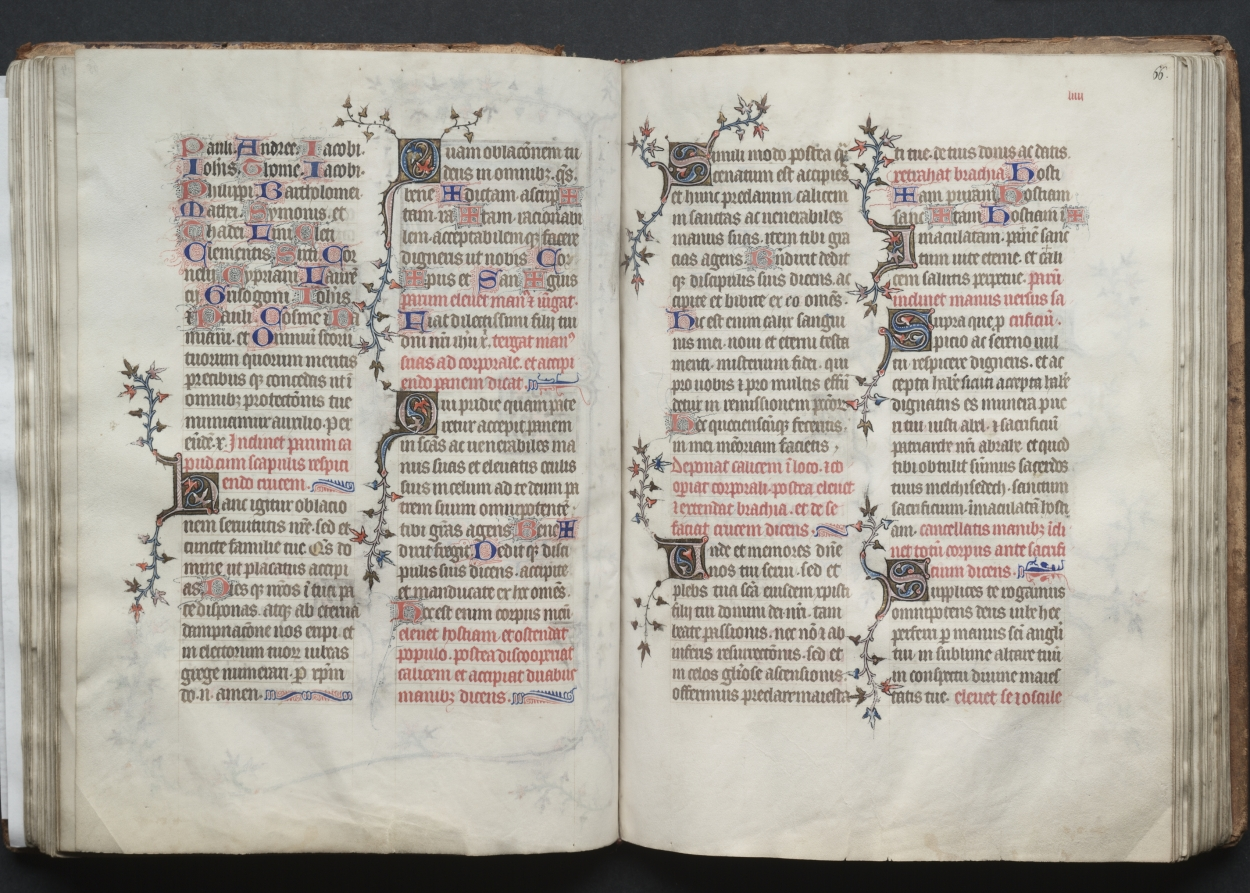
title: The Gotha Missal: Fol. 66r, Text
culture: France, Paris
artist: Master of the Boqueteaux (French)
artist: and Workshop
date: c. 1375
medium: ink, tempera, and gold on vellum; blind-tooled leather binding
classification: Bound Volume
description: The style and quality of this manuscript's decoration is typical of deluxe Parisian books made for aristocratic or royal patrons. Most of the book's decoration appears to be the work of the Master of the Boqueteaux, an artist active at the court of King Charles V (died 1380). His style was apparently shared by a number of book illuminators working in and around Paris. It is very possible that the Gotha Missal belonged to Charles V, but is not provable because the manuscript has no royal portraits and lacks a colophon. Given the book's magnificent decoration, however, it would seem that it was produced for a Valois prince, if not for the king himself. The manuscript receives its name from the German dukes of Gotha, its later owners.